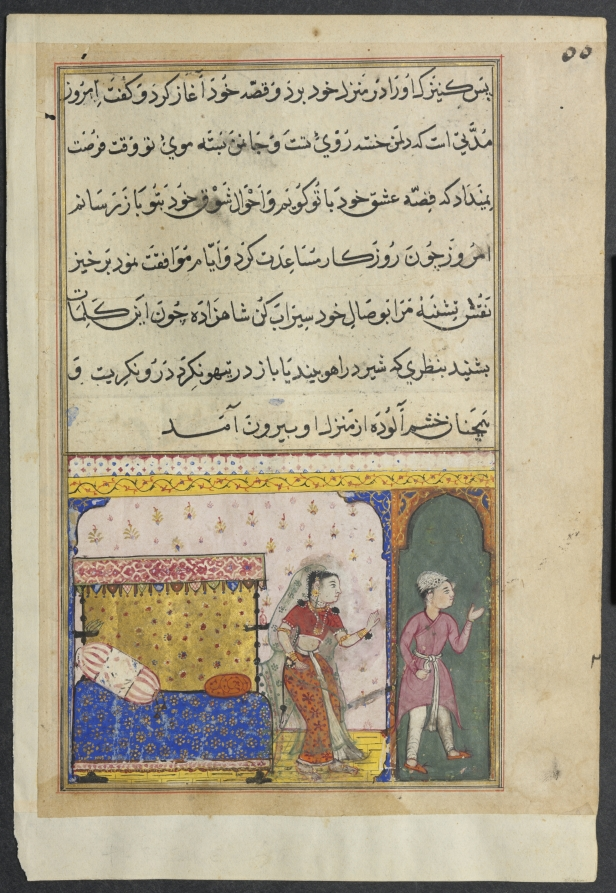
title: The prince rejects the amorous advances of the king’s handmaiden, from a Tuti-nama (Tales of a Parrot): Eighth Night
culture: Mughal India, court of Akbar (reigned 1556–1605)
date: c. 1560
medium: gum tempera, ink, and gold on paper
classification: Painting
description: Once the handmaiden got the prince to her rooms, she suggested they have an affair and professed her secret feelings for him. He rebuffed her in silence and departed, disgusted. Insulted and afraid of what the prince might tell the king, she accused the prince of having attempted to rape her. The king then sentenced the prince to death. The handmaiden wears an Indian sari, consisting of an orange printed wrapped skirt secured with a sash, a short red blouse, and a long diaphanous scarf worn over her head. The prince is dressed in the Central Asian tunic and pants customarily worn by the Mughals.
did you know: The prince is only thirteen-years-old in the story.